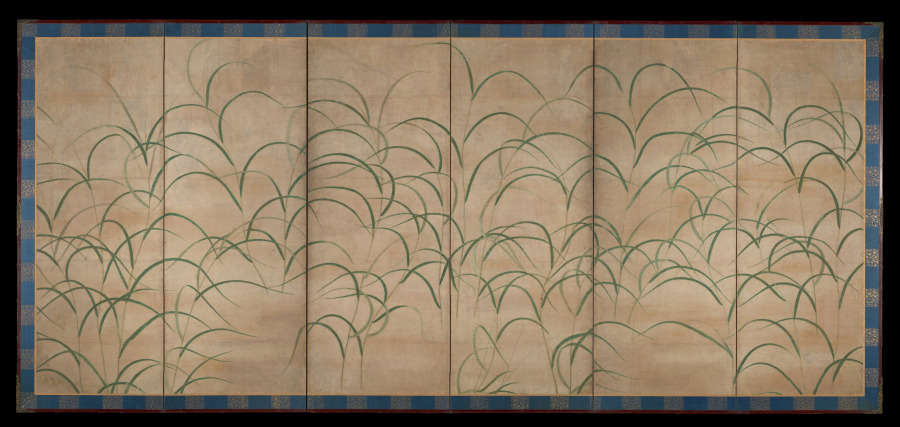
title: Susuki Grass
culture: Japan, Muromachi period (1392–1573)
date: c. 1525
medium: One of a pair of six-panel folding screens; ink, color, and gold on paper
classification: Painting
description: Susuki grass has a seasonal association with autumn in the Japanese visual and literary tradition. It is one of the “Seven Flowers of Autumn,” along with bush clover, arrowroot, pink, patrinia, mistflower, and bellflower. This composition immerses the beholder in a field of grasses and golden bands of mist. The design may have served as a backdrop for poems brushed in ink on decorated papers and attached to the surface of the screens, a practice with a long tradition in Japan.